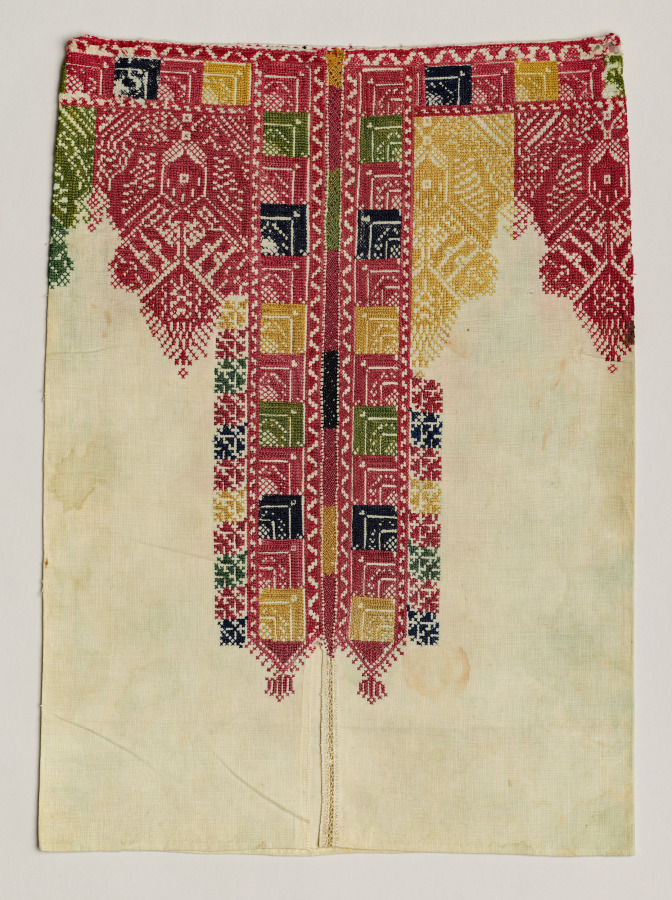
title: Furnishing textile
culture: Africa, North Africa, Morocco, Meknès, Moroccan embroiderer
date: 1800s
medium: Cotton, silk, dye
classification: Embroidery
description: This densely embroidered textile from Meknès, Morocco was possibly used as a pillow cover.